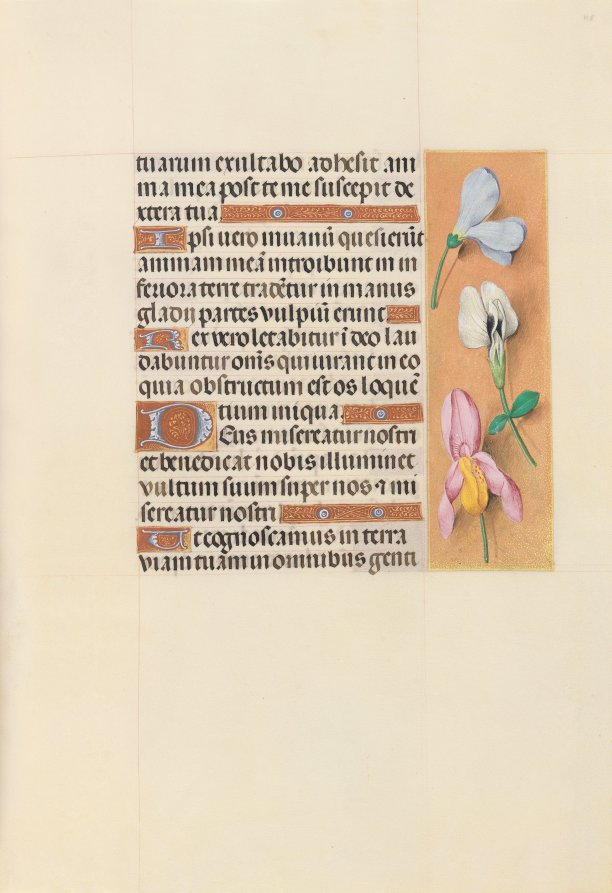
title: Hours of Queen Isabella the Catholic, Queen of Spain: Fol. 118r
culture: Flanders, Ghent and Bruges, late 15th century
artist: Master of the First Prayerbook of Maximillian (Flemish, c. 1444–1519)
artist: and Associates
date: c. 1500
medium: ink, tempera, and gold on vellum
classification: Bound Volume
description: This manuscript was illuminated by a circle of at least five highly organized manuscript painters active in the Flemish cities of Ghent and Bruges. The principal illuminator was Alexander Bening, who painted the majority of the book's miniatures. Manuscripts produced by this circle of artists are renowned for the decoration of their borders, which typically feature a rich variety of realistically-painted flowers, birds, and butterflies. This prayer book, called a book of hours, was intended not for a cleric, but for the private devotions of a lay person-in this case, Isabella the Catholic, Queen of Spain (1451-1504). Isabella's coat of arms embellishes the book's frontispiece. It is unlikely that the book was commissioned by the Queen herself; rather, she probably received it as a diplomatic gift from someone courting her patronage, perhaps Cardinal Francisco Jimenez de Cisneros. A Franciscan friar, Jimenez was dependent upon Isabella for his advancement, first to the post of Queen's confessor in 1492, and then to Archbishop of Toledo in 1495.